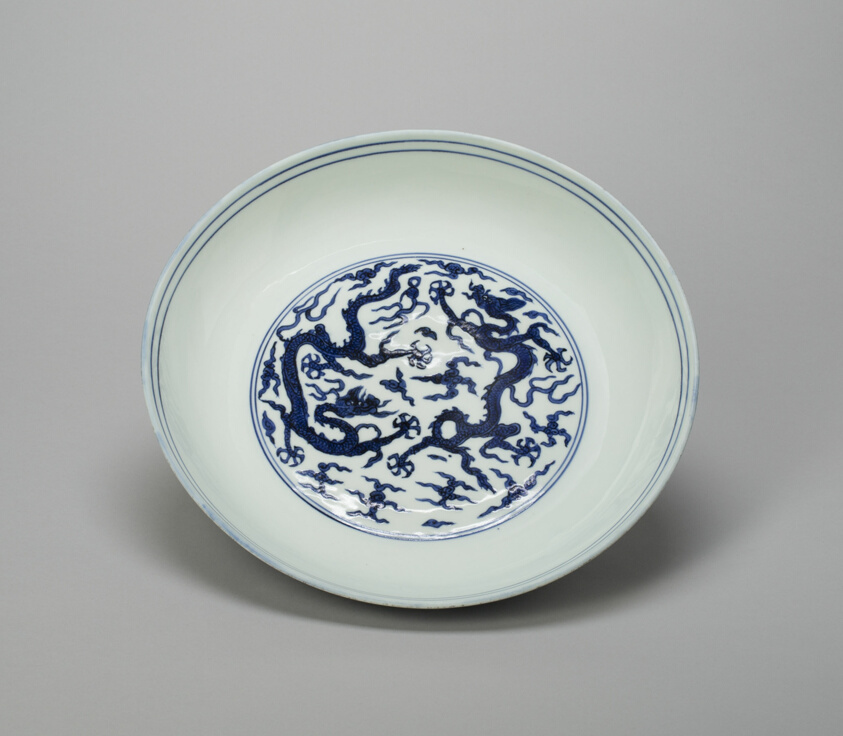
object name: Vessel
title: Dish with Dragons, Flaming Pearls, and Cloud Scrolls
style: Chinese (culture or style)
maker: China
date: Ming dynasty (1368–1644), Jiajing reign mark and period (1522–1566)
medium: Porcelain painted in underglaze blue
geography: China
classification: dish (vessel); porcelain; ceramics; asian art; vessel